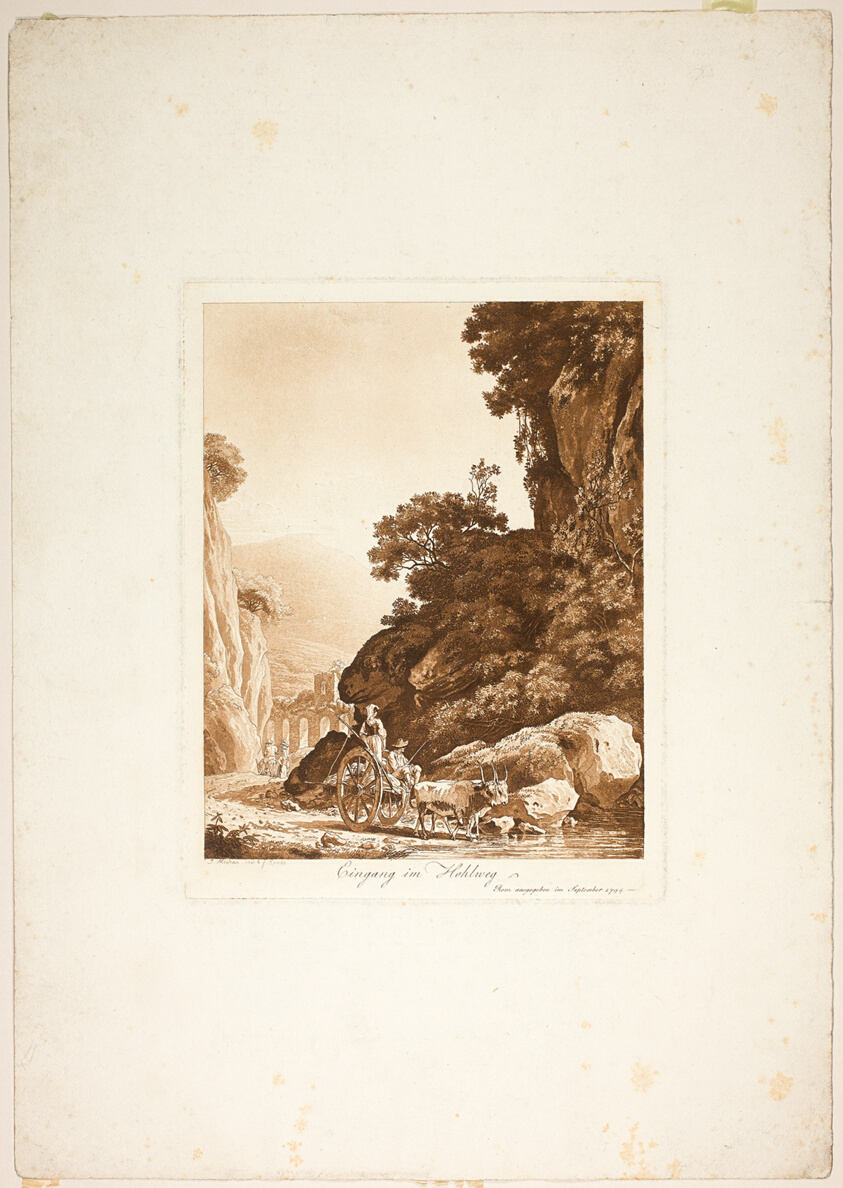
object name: Print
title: Entrance to the Narrow Pass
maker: Jacob Wilhelm Mechau (German, 1745-1808)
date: 1794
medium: Etching and aquatint in sanguine on ivory wove paper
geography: Germany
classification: etching; print; prints and drawing